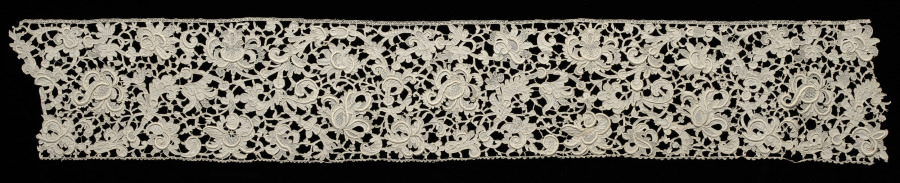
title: Lace Flounce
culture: Italy, Venice, 1600s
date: 1600s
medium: Linen: needle lace (Venetian Raised Point)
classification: Lace